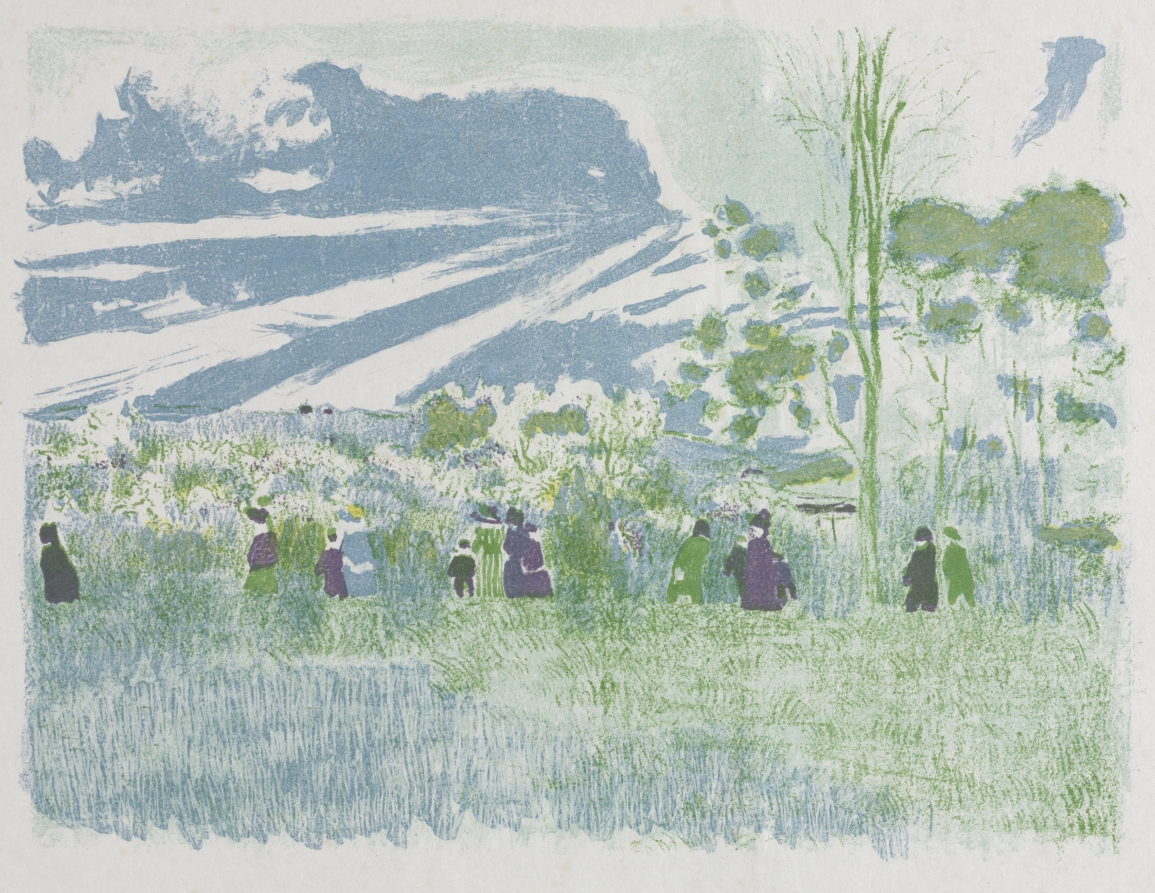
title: Across the Fields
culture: France, 19th century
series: Landscapes and Interiors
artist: Édouard Vuillard (French, 1868–1940)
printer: Auguste Clot (French, 1858–1936)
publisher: Ambroise Vollard (French, 1867–1939)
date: 1899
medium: color lithograph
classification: Print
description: In this print, Edouard Vuillard used simplification of detail to suggest the sense of relaxation and freedom that he found in the landscape depicted. He used seemingly shapeless blots of color that remain recognizable as figures: the woman in a striped dress keeps a firm hold on her child, as though restraining him from running through the field, and a man in green turns and leans with the proper combination of intimacy and formality to engage with the couple behind him.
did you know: On August 31, 1890, Vuillard wrote in his journal to “conceive of a picture really as a series of harmonies.”